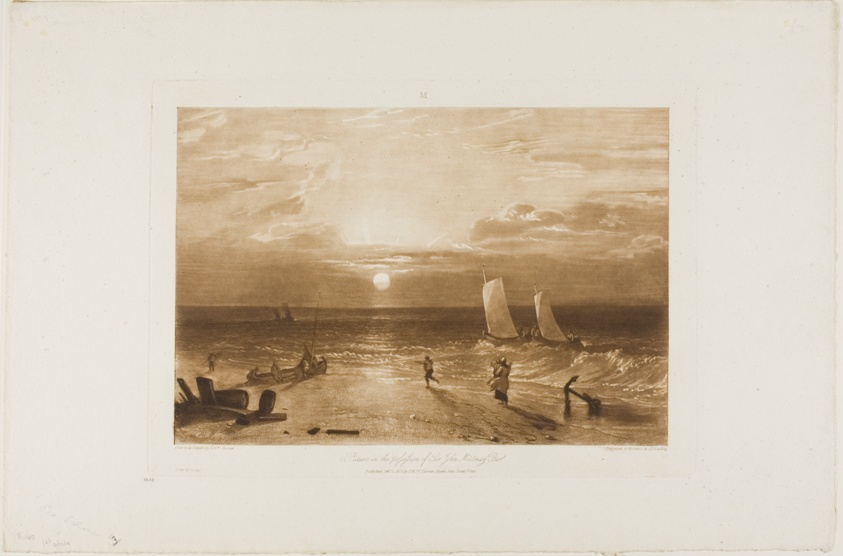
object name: Print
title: The Mildmay Sea-Piece, plate 40 from Liber Studiorum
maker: Joseph Mallord William Turner (English, 1775-1851); engraved by W. Annis and I.C. Easling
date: published February 11, 1812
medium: Etching and engraving in brown on ivory wove paper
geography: England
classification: etching; print; prints and drawing